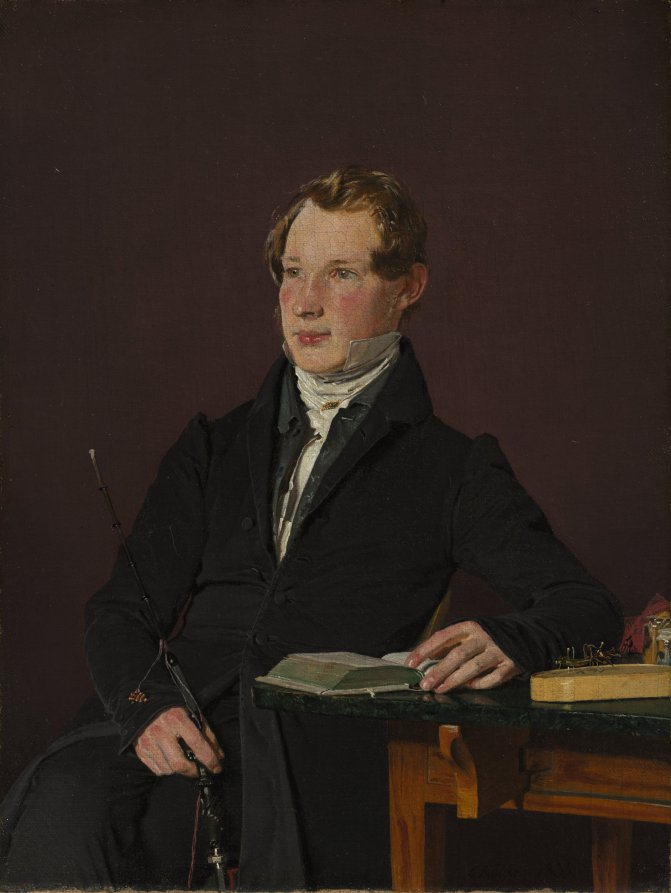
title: Dr. Johann Henning Kjetil Hjardemaal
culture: Denmark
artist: Christen Købke (Danish, 1810–1848)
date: 1833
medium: oil on fabric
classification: Painting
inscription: Signed and dated in black paint bottom right corner: C Köbke 1833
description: The sitter (1812-1844) was born on the island of Saint Thomas, at that time a colony in the Danish West Indies. He was sent to Copenhagen to study medicine and later set up practice at Satrup in Schleswig, then part of Denmark. For health reasons, he returned with his wife to the Virgin Islands, where they both died in 1844.